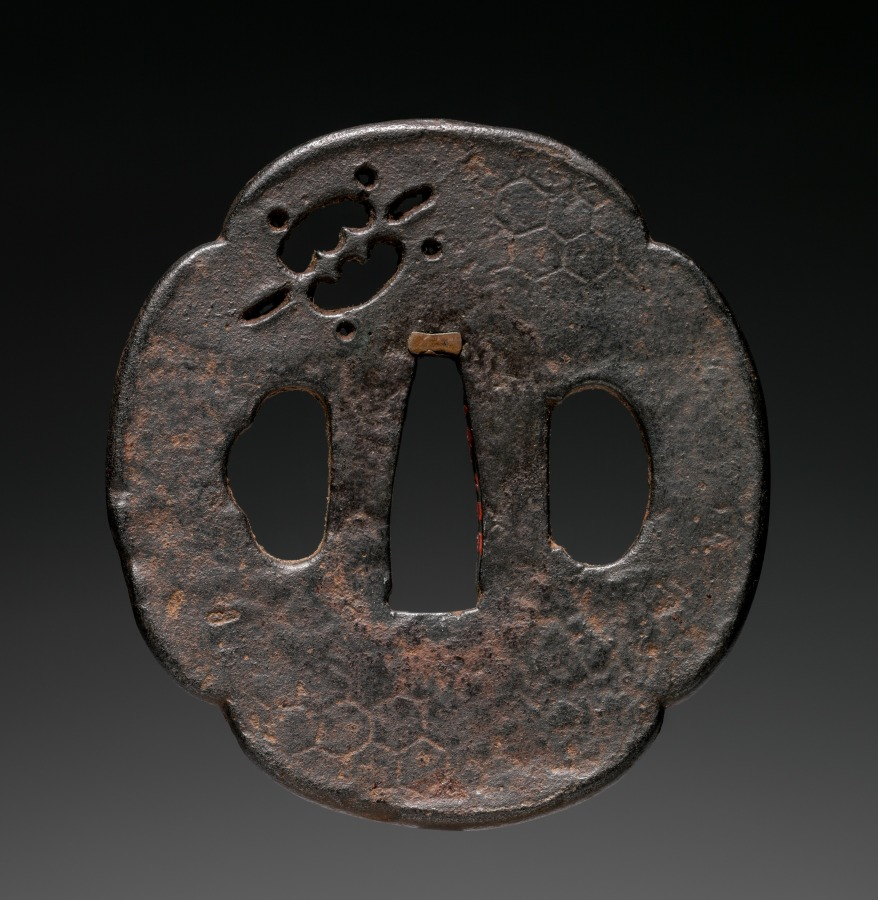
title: Sword Guard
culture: Japan, Muromachi period (1392–1573)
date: 1500s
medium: iron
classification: Arms and Armor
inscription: Signature: Nobuiye